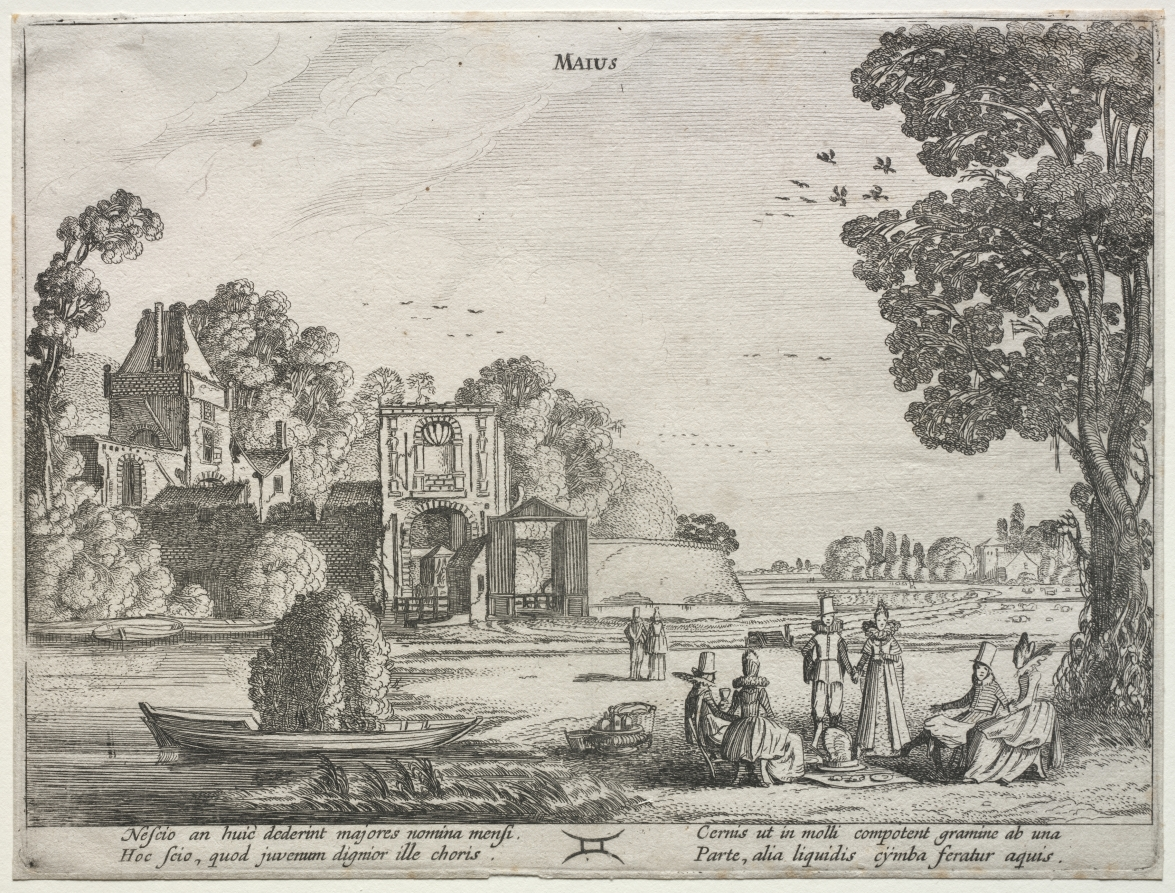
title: The Twelve Months: May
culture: Netherlands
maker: Jan van de Velde II (Dutch, 1593–1641)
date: 1608–18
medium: etching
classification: Print